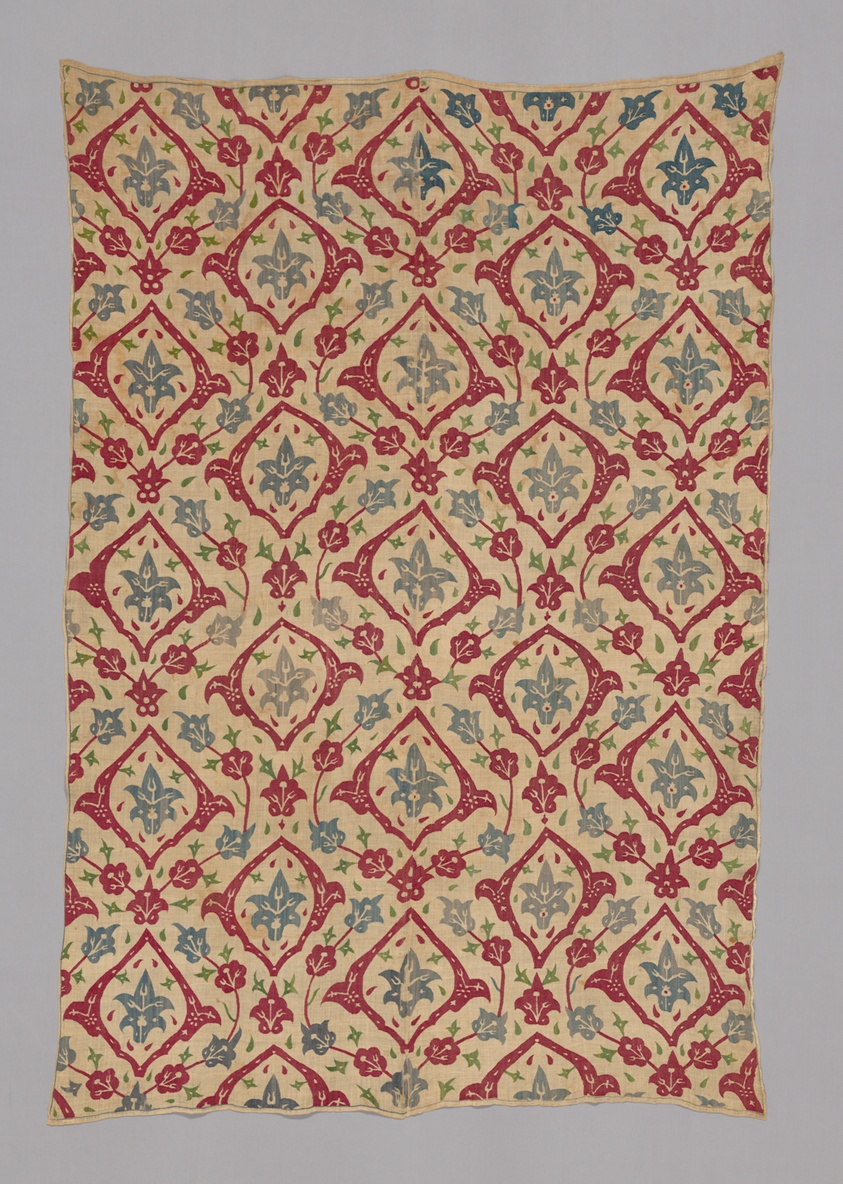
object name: Textile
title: Cover or Hanging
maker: Turkey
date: 17th century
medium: Embroidered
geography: Turkey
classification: textile; weaving; needlework (visual works)